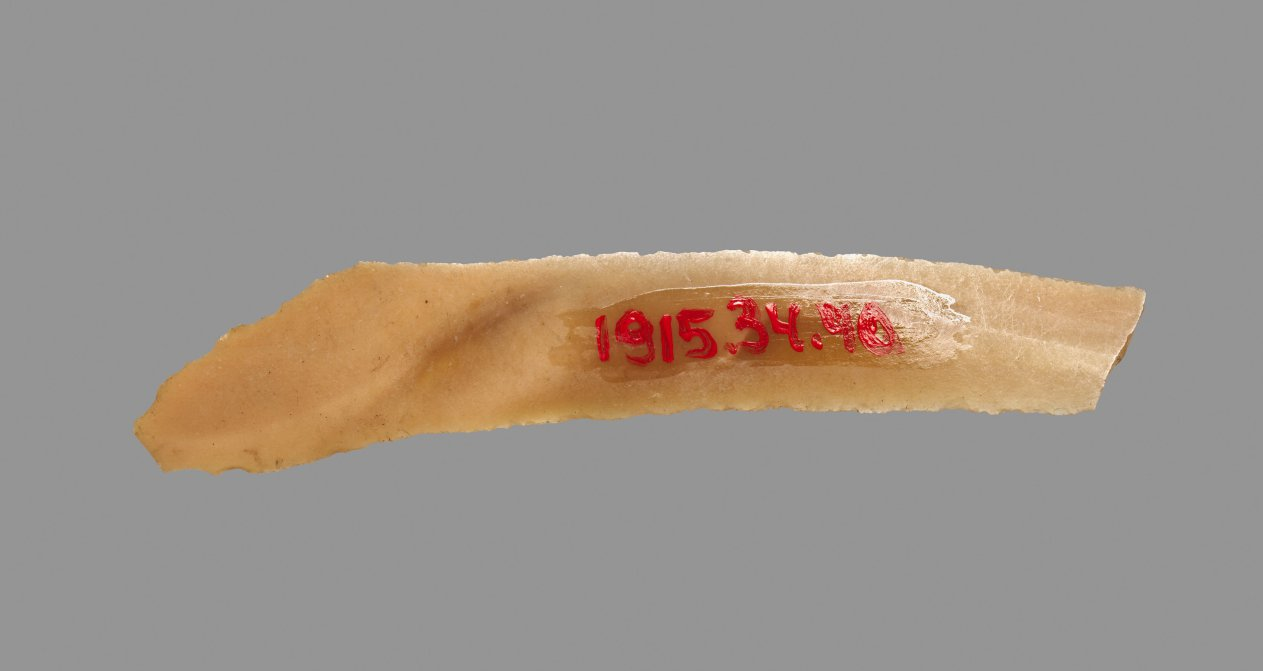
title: Sickle Blade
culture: Egypt, Middle Kingdom (2040–1648 BCE), Dynasty 12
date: 1980–1801 BCE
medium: flint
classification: Implements